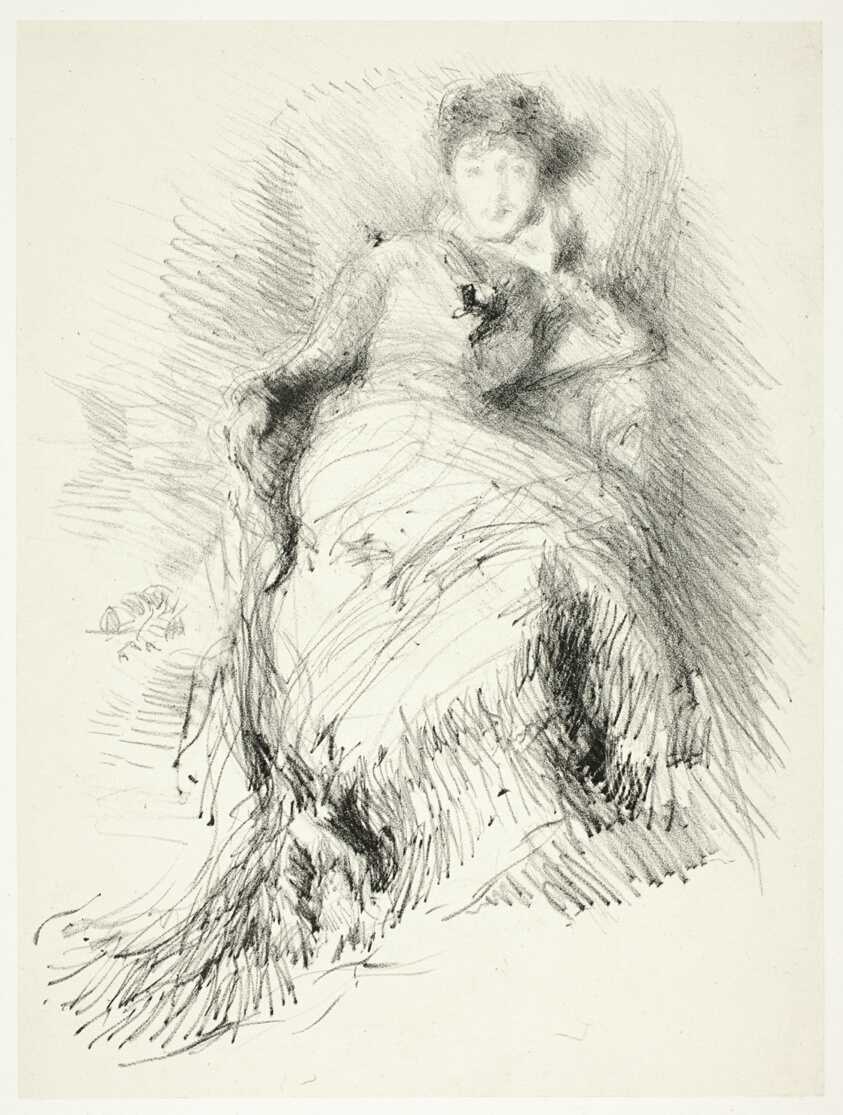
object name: Print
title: Study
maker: James McNeill Whistler (American, 1834-1903)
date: 1878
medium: Lithograph in black ink with scraping on cream chine (Japanese paper) laid down on ivory plate paper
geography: United States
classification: lithograph; print; prints and drawing; paper